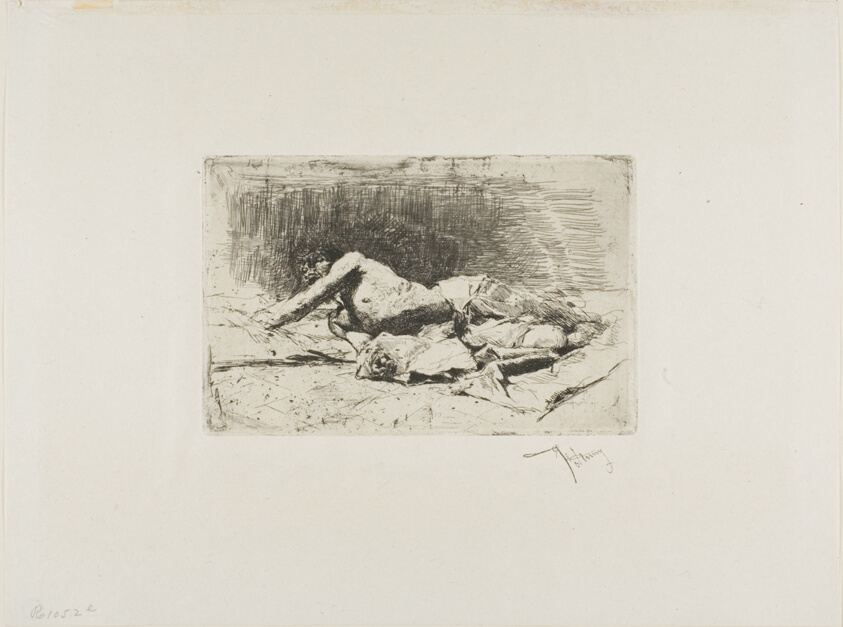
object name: Print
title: Man Rolling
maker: Mariano José María Bernardo Fortuny y Carbó; Spanish, 1838-1874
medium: Etching on paper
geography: Spain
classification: etching; print; prints and drawing